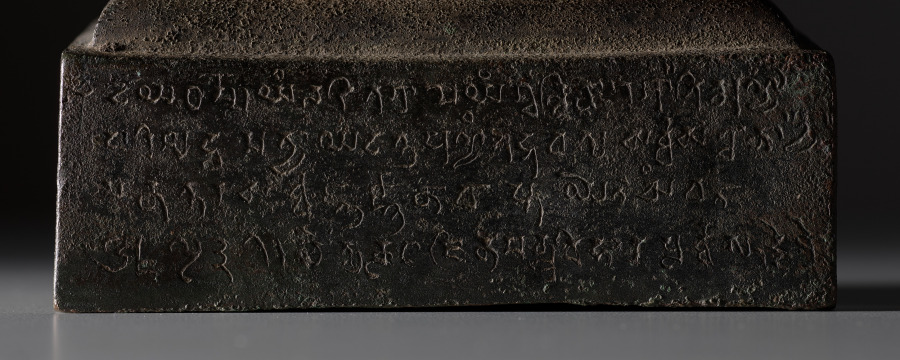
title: Standing Buddha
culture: Northern India, Uttar Pradesh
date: 591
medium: bronze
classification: Sculpture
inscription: 1. ṹ deyadharmmoyaṃ laḍitagrāme yaṃgvalvihāre śā[kya] bhikṣuṇyā 2. pariśuddhamatyā yadattra puṇyaṃ tadbhavatu sarvvasatvānā- 3. manuttarasarvva jñānāvāptaye/ / saṃvat 4a. 500 10 3/ / caityakūta jinabandhuvihārapūrvva-bhuddeśe 4b. piṇḍakena bhojanaṃ karttavya*/ / *Mistake for karttavyam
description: This bronze Buddha is exceptional, because it carries an inscription on its base that dates its manufacture to the year 591. According to the inscription, the sculpture was dedicated by a nun who was from a village in Nepal, but she probably commissioned it at a workshop in northern India. The Buddha's robe on this image has been left plain, without pleat lines to obscure the beauty of the contours of the body. Only the rippling scalloped clusters of the garment’s hem lend some sense of energy and subtle ornament to the composition.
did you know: Around the time when this sculpture was made, portable bronzes began to replace relics as the principal sacred commodity circulating in the Buddhist world.